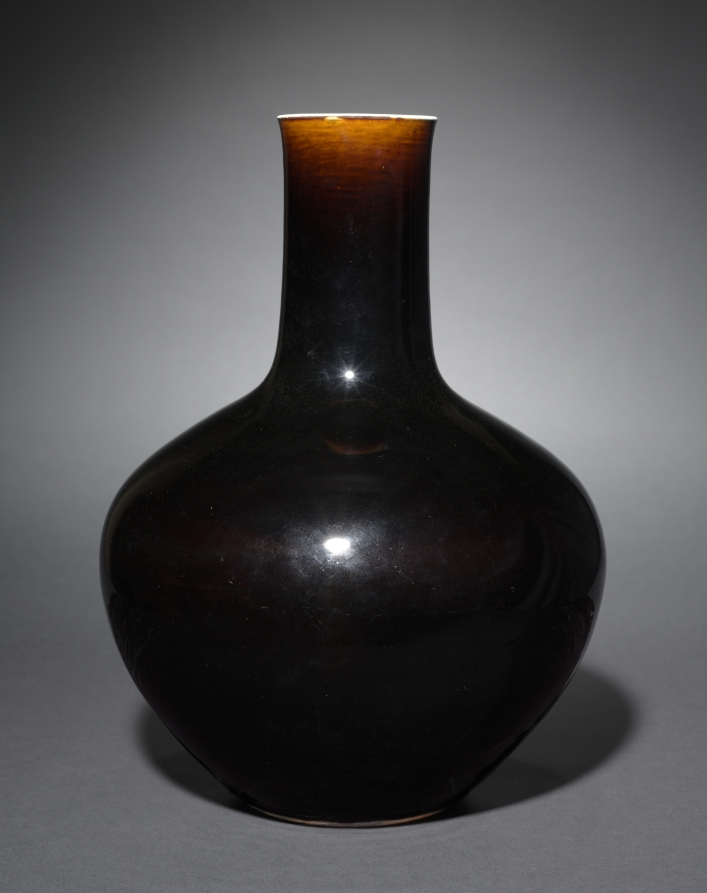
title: Bottle-Shaped Vase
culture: China, Jiangxi province, Jingdezhen kilns, Qing dynasty (1644–1911), Qianlong reign (1736–95)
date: 1736–95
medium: porcelain with mirror-black glaze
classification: Ceramic